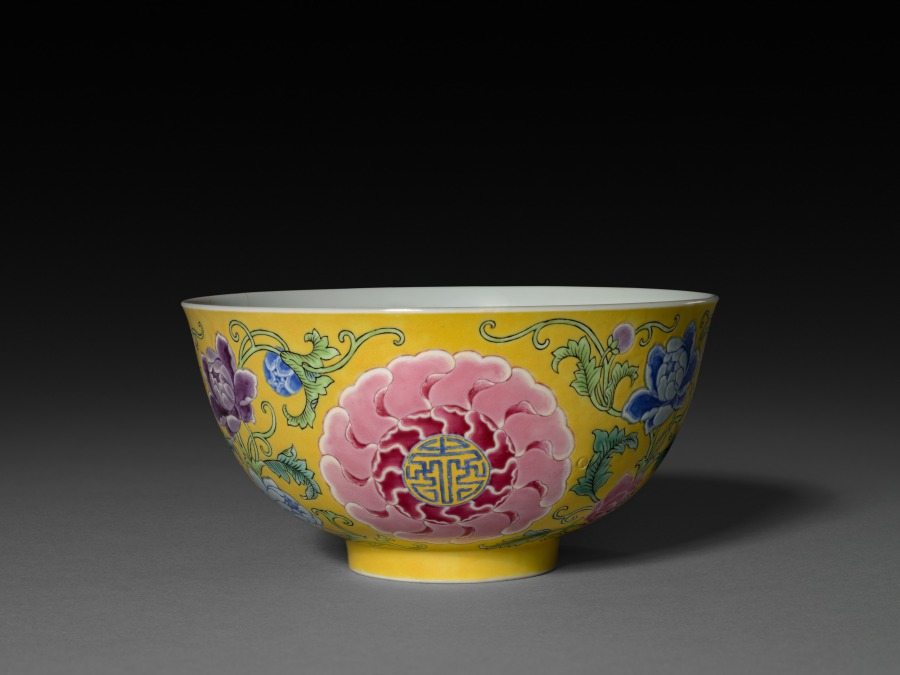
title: Bowl with Floral Sprays and Inscribed Medallions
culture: China, Jiangxi Province, Jingdezhen kilns, Qing dynasty (1644–1911)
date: 1800s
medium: porcelain with famille rose overglaze enamel decoration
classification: Ceramic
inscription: 大清康熙年制